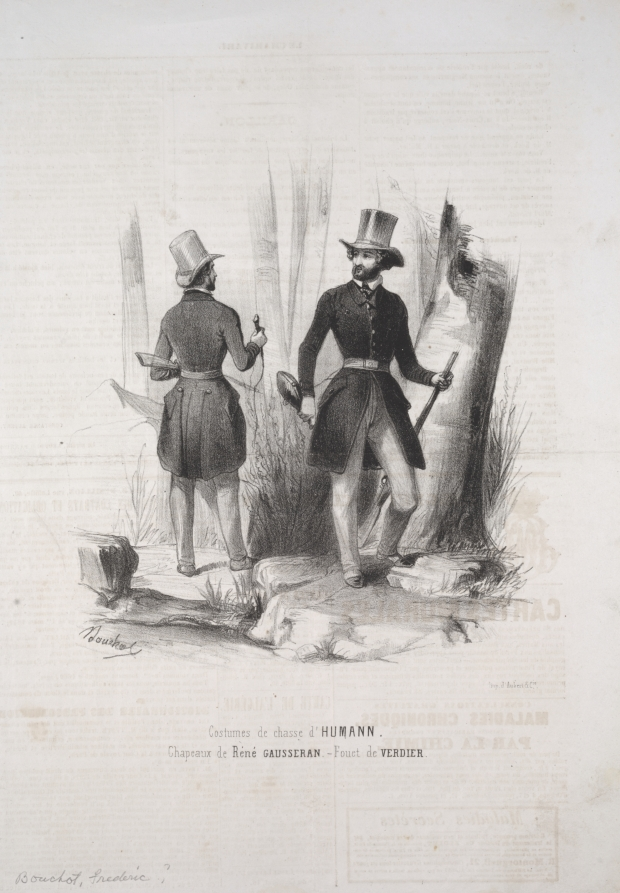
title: Costumes de Chasse d'Humann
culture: France, 19th century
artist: Frédéric Bouchot (French)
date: c. mid 1800s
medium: lithograph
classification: Print